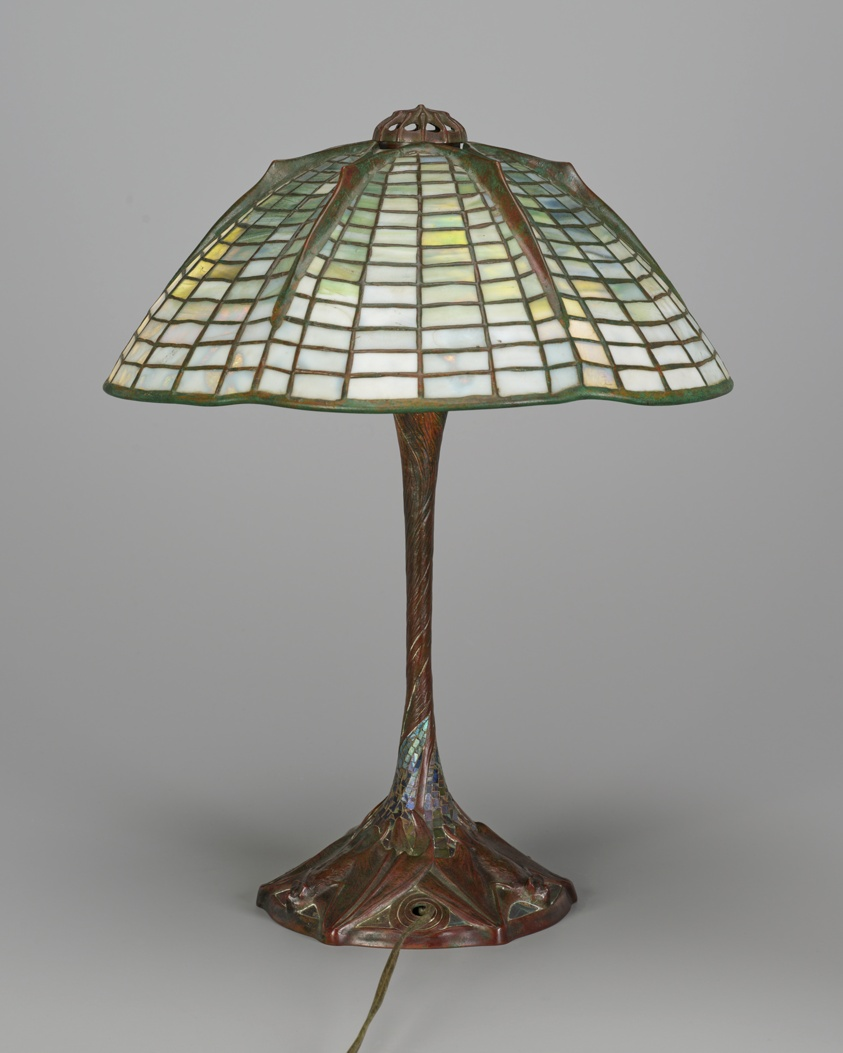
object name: Furnishings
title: Lamp with “Heavy Ribs” Shade and “Bat” Base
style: Arts and Crafts Movement, 20th Century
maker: Tiffany Studios (American, 1902–32); Corona, New York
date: c. 1905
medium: Favrile glass, leaded glass, and bronze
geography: Corona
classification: lamp (lighting device); american decorative arts; decorative arts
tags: bats, mosaic, spiders, spiderwebs